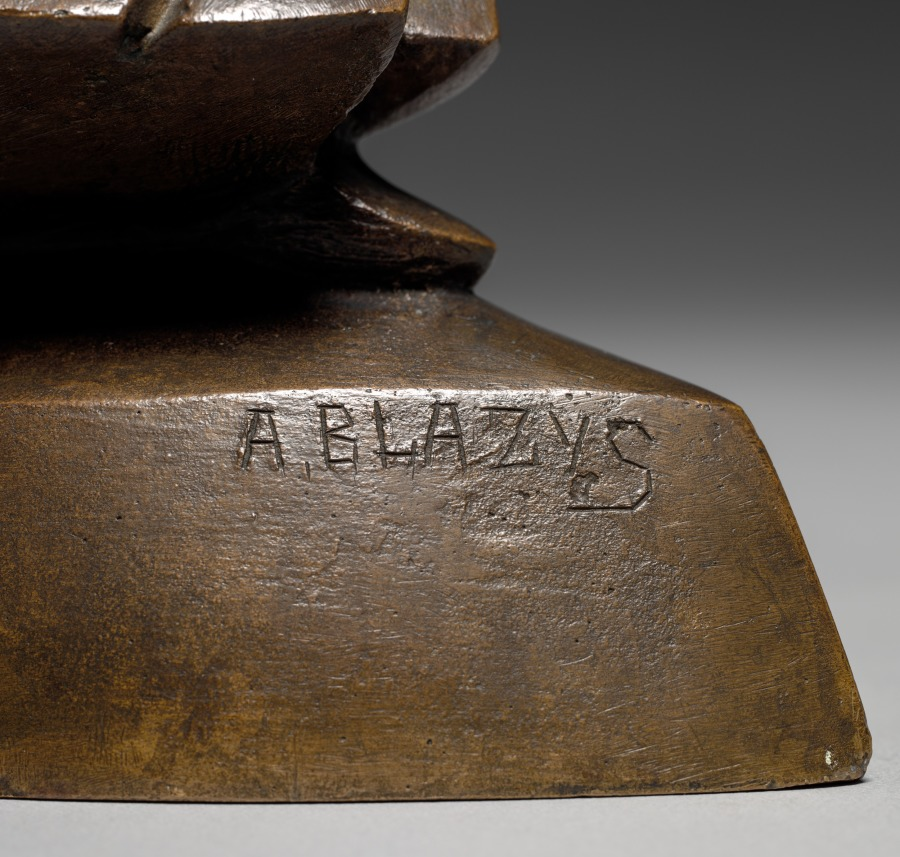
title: Russian Dancer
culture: America, Ohio, Cleveland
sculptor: Alexander Blazys (American, born Russian Empire [now Lithuania], 1894–1963)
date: 1925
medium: bronze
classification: Sculpture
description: A Lithuanian immigrant, Blazys introduced modernist sculpture to Cleveland upon his arrival in 1925. These figures merge rhythmic movement inspired by music with faceted, geometric planes derived from Cubism.